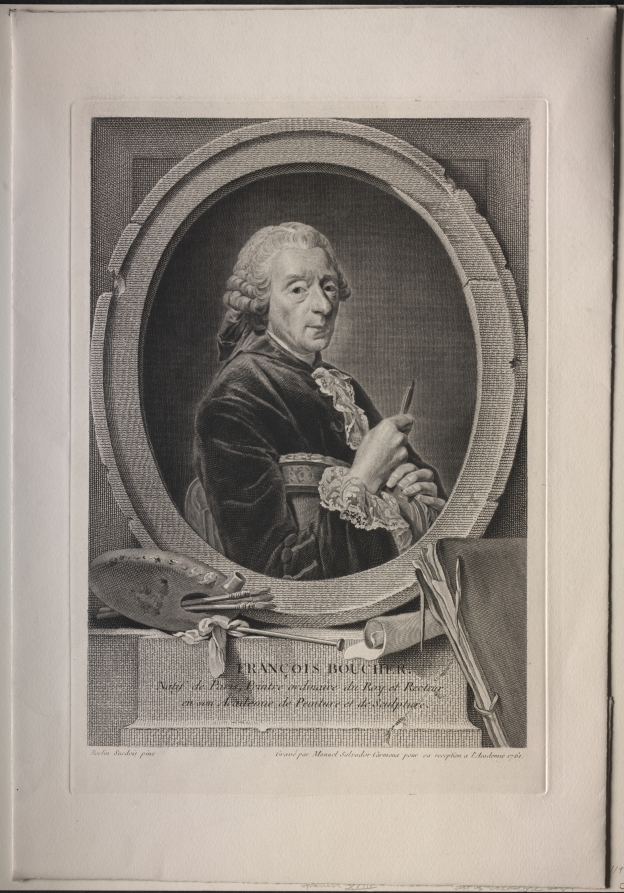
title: François Boucher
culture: Spain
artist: Manuel Salvador Carmona (Spanish, 1734–1820)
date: 1761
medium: engraving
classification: Print